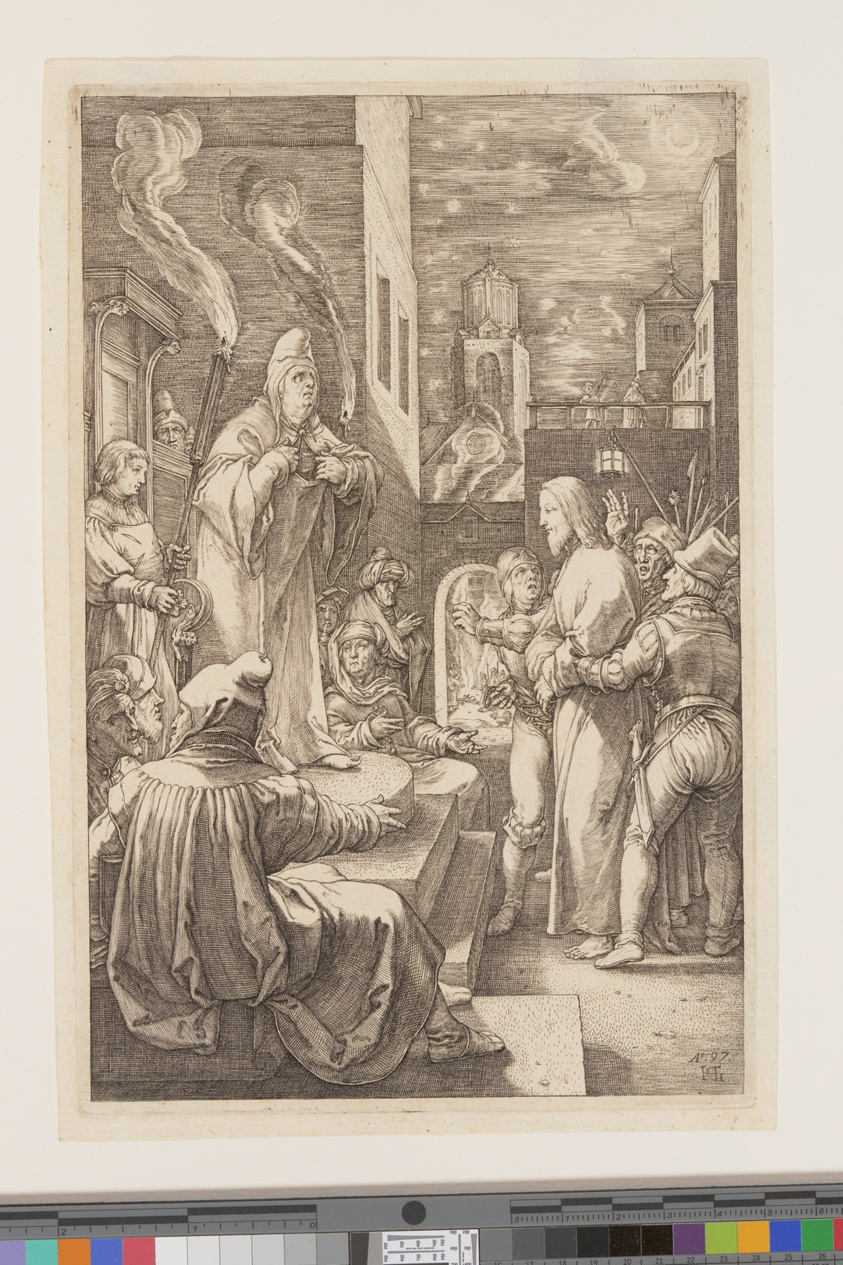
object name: Print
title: Christ before Caiaphas, from The Passion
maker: Hendrick Goltzius (Dutch, 1558–1617)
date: 1597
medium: Engraving on ivory laid paper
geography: Netherlands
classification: engraving; paper; print; prints and drawing